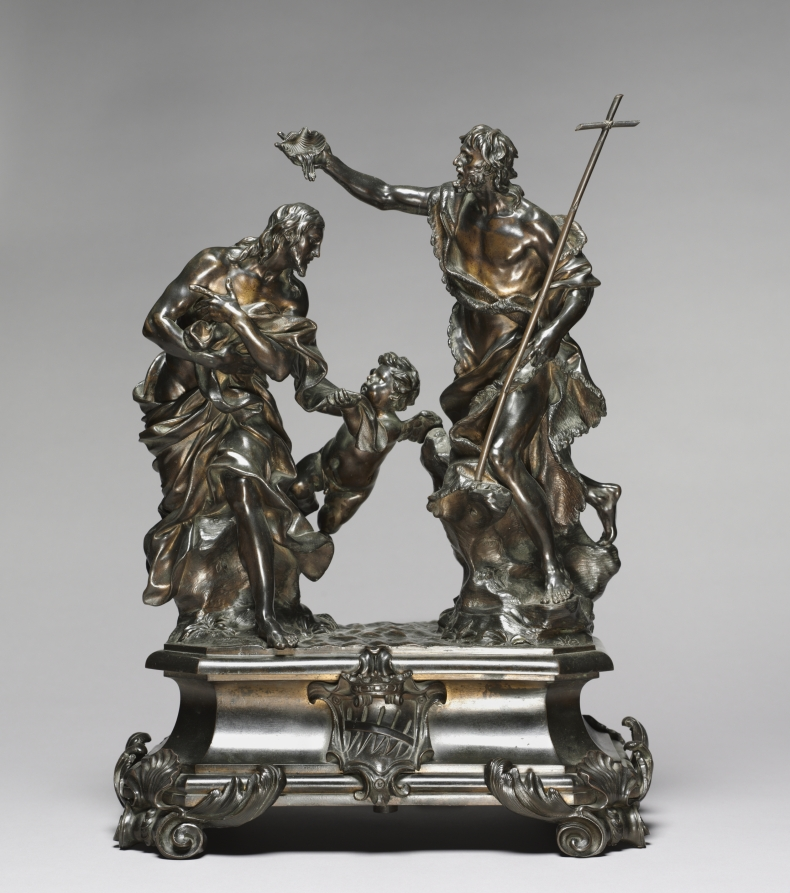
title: Baptism of Christ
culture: Italy, 17th century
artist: Alessandro Algardi (Italian, 1598–1654)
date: designed 1645–46, probably made 1650–55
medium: bronze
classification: Sculpture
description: When Innocent X (Giovanni Battista Pamphili, ruled 1644–55) became pope, Alessandro Algardi endeavored to obtain his patronage. This bronze Baptism of Christ is a casting from the molds used for an original silver sculpture that Algardi presented to the new pope to gain his support in 1646. The composition depicts an important scene in the life of Christ. On the right is John the Baptist, who pours water onto Jesus's head from a shell. As Christ bows his head to be baptized, a little angel holds the edge of his cloak. Algardi worked carefully to make this piece exciting from a number of points of view. Its dramatic emphasis shifts, depending on the viewer's vantage point.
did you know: Algardi's sculpture plays on its intended recipient's given name: Giovanni Battista (John the Baptist).